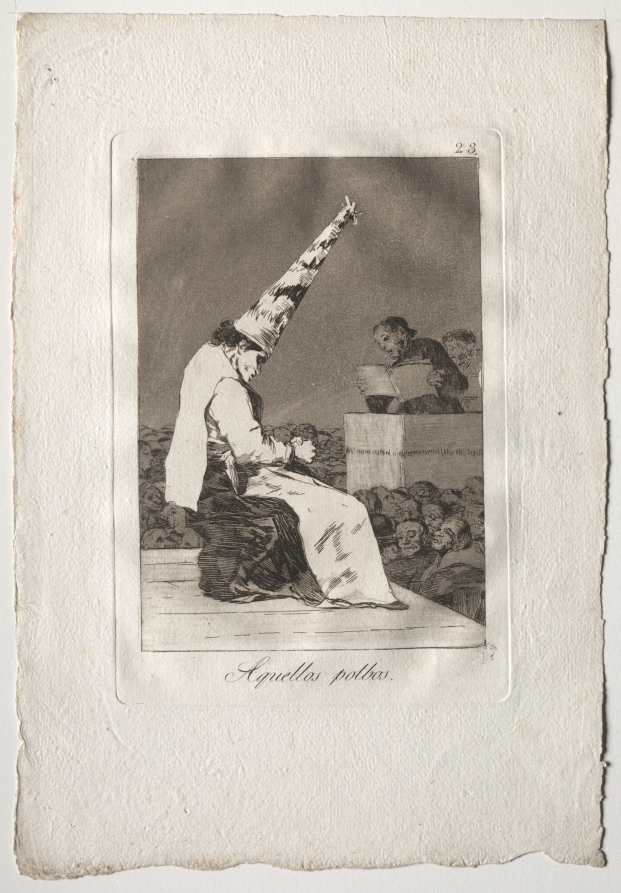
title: Those Specks of Dust, Plate 23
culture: Spain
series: Los Caprichos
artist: Francisco de Goya (Spanish, 1746–1828)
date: 1799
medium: etching and aquatint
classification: Print